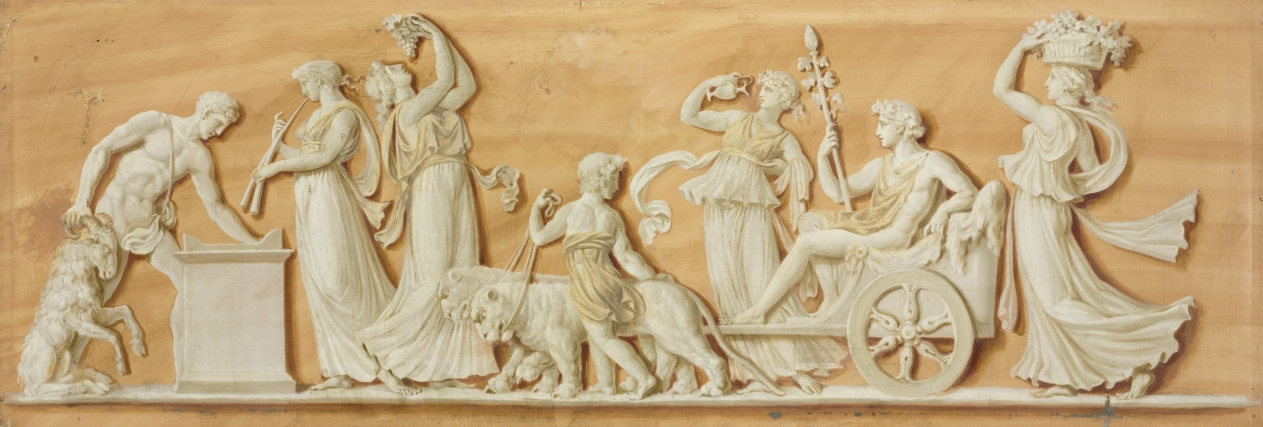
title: Overdoor Painting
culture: France, 18th century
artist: Pierre Rousseau (French, 1751–1829)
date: 1790s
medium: oil on canvas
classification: Painting